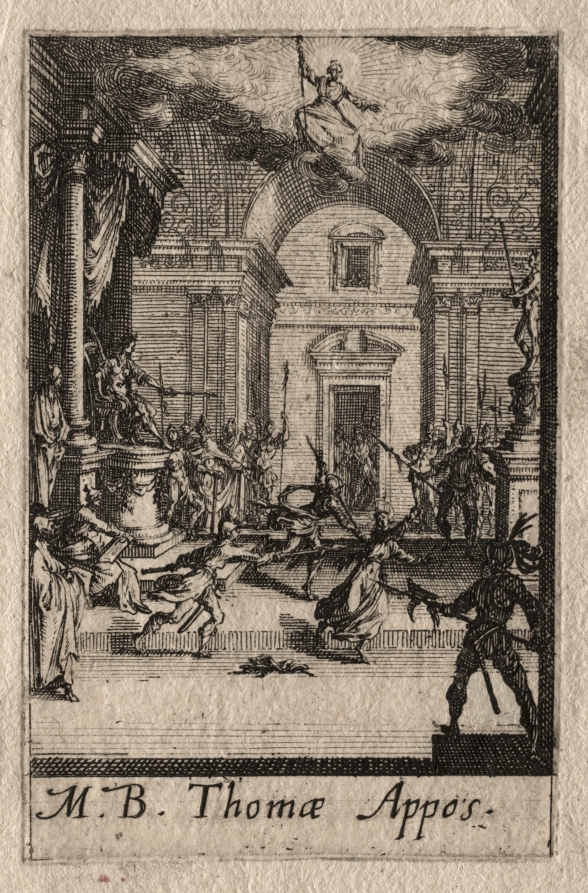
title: The Martyrdom of the Apostles: St. Thomas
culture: France, 17th century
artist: Jacques Callot (French, 1592–1635)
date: ca. 1632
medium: etching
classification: Print